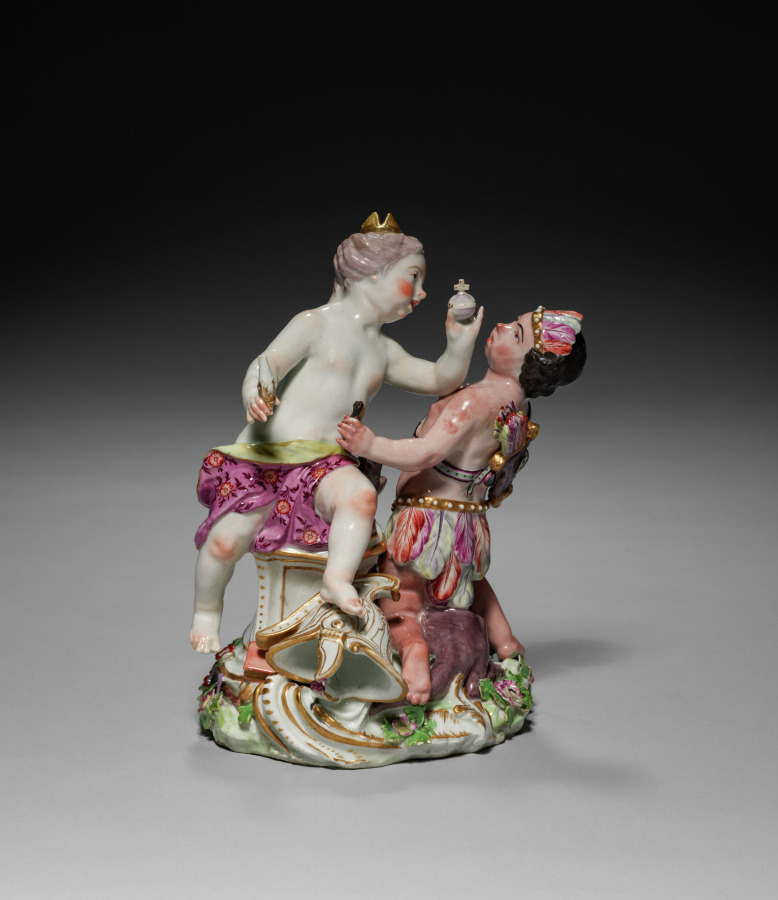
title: Figure of Europe and America from the Four Continents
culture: England, Chelsea, mid-18th century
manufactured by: Chelsea Porcelain Factory (Britain, London, 1745–84)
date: c. 1760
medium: soft-paste porcelain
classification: Ceramic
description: Often collected by wealthy British merchants who were beneficiaries of colonial expansion, figural groups were frequently part of elaborate table decorations meant to signify wealth and global dominance. Here, Europe is seen holding an orb and wearing a crown as queen of the world, suggesting Europe’s supremacy over the other continents. She is entangled with America, who is wearing feathers with a bow and arrow at her feet. This depiction of America reveals a purely imagined understanding of faraway places.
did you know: Figural representations of the four continents date back to the 1500s, but such imagery became even more popular in the 1700s as European empires expanded.